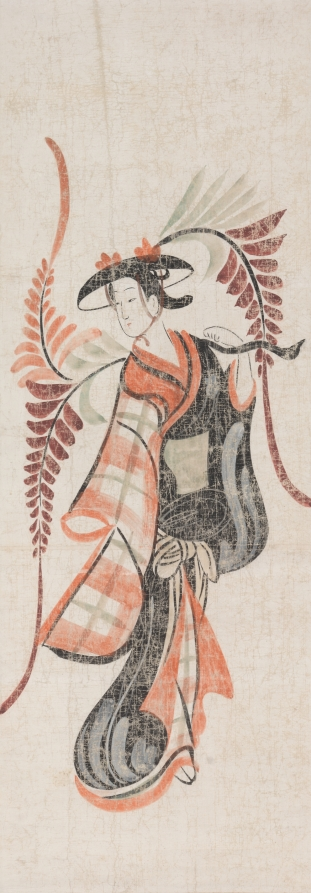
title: Wisteria Maiden (Fuji Musume)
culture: Japan, Edo period (1615–1868)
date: 1615–99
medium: hanging scroll; ink and color on paper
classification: Painting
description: The wisteria maiden is an otsu-e subject thought to have been inspired by popular dances. Paintings such as this were often sold as good-luck charms for marriages.